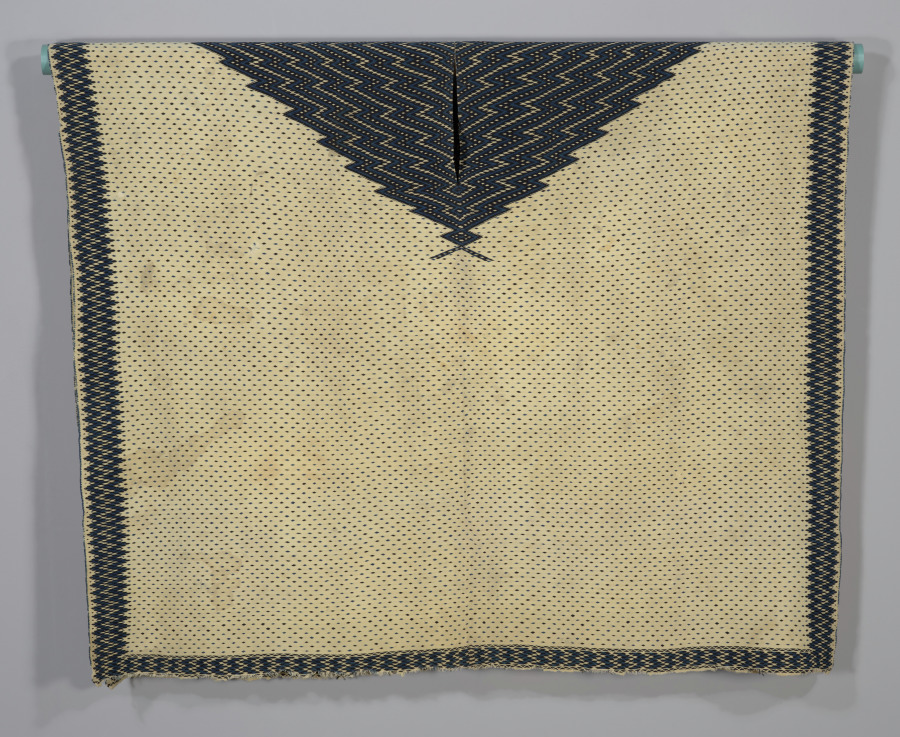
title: Saltillo Sarape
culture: Mexico, Coahuila state, Saltillo Region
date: c. 1820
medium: Wool, cotton; tapestry weave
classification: Textile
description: The sarape (wearing blanket) is a classic Mexican men’s garment that became a symbol of national identity and pride after Mexico achieved independence from Spain in 1821. Examples woven between about 1750 and 1875 in Saltillo, a town in northern Mexico, are the sarape’s most famous representatives, prized for their design, color, and technical refinement.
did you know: Saltillo sarapes (wearing blankets) are prized for their design, color, and technical refinement.